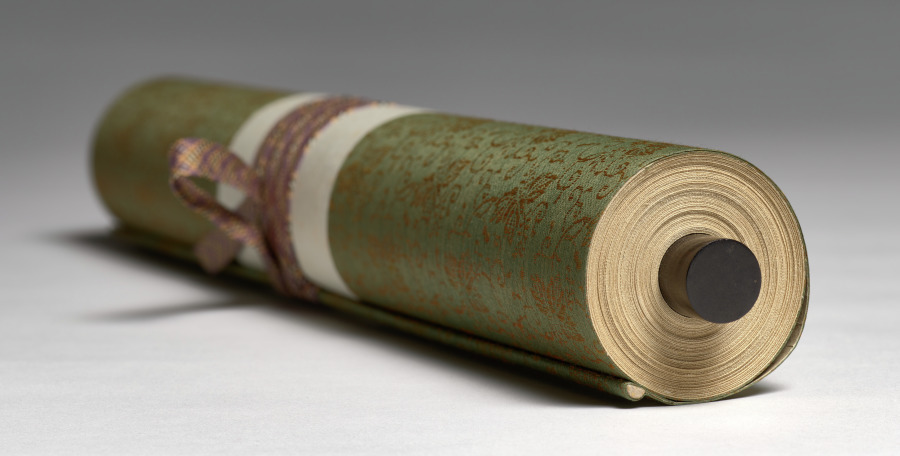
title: Poems and Pictures of the Eight Views of Xiao-Xiang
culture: Japan, Momoyama period (1573–1615)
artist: Unkoku Tōgan (Japanese, 1547–1618)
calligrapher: Inkei Gentetsu (Japanese, 1562–1612)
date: 1605–12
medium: Handscroll; ink on paper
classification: Painting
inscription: Each painting sealed with red gourd-shaped seal reading Unkoku (雲谷) and a square seal reading Tōgan (等顔).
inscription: Each painting prefaced with a titled poem on the Eight Views of Xiao-Xiang by Yujian Ruofen (active late 13th century) inscribed by Japanese Buddhist monk Inkei Gentetsu (1562–1612).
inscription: 右寫玉㵎之筆勢／雪舟末葉等顔筆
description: Unkoku Tōgan brushed these scenes using the splashed-ink technique associated in Japan with the Chinese monk Yujian Ruofen (active late 1200s). Xiao-Xiang refers to the region in present-day Hunan province, where the Xiang River and its tributaries converge. Each of the eight views evokes a time of day or season. The earliest surviving series of Xiao-Xiang paintings is by Wang Hong (active mid-1100s), but textual evidence tells us the theme appears earlier. It was later adopted in Japan and Korea, as seen here. The poems were inscribed by Inkei Gentetsu, the third abbot of the Rinzai Zen temple Tōshunji, Japan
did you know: The “Tō” of Tōgan comes from the name of painter Sesshū Tōyō (1420–1506).